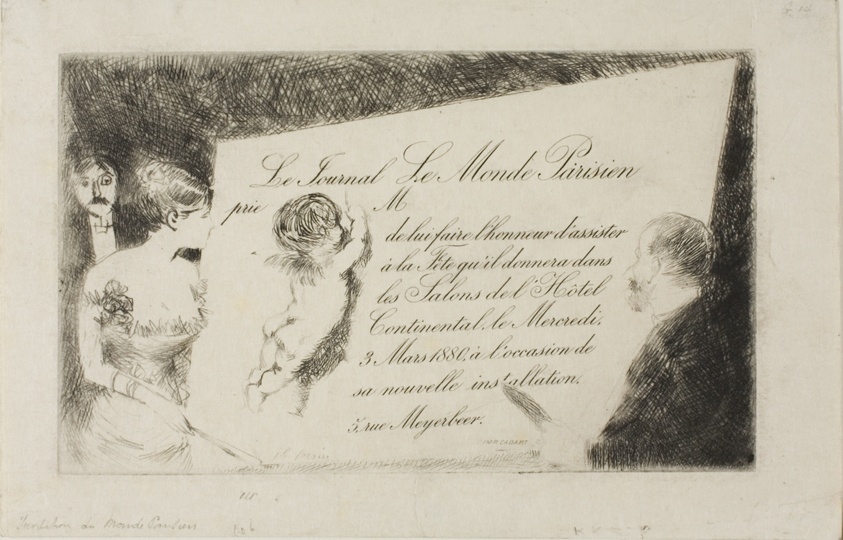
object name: Print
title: Invitation from the newspaper "Le Monde Parisien"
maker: Jean Louis Forain (French, 1852-1931)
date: 1880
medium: Etching on ivory wove paper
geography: France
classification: etching; print; prints and drawing